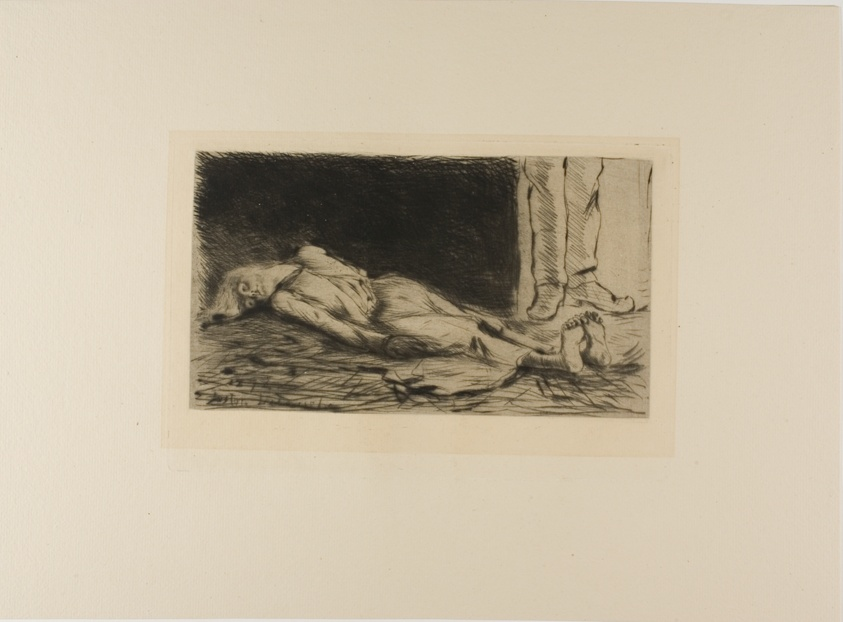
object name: Print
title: Plate from l'Assommoir (woman lying on floor)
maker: Gaston La Touche (French, 1854-1913)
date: 1878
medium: Drypoint and plate tone on ivory laid paper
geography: France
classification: drypoint; print; prints and drawing